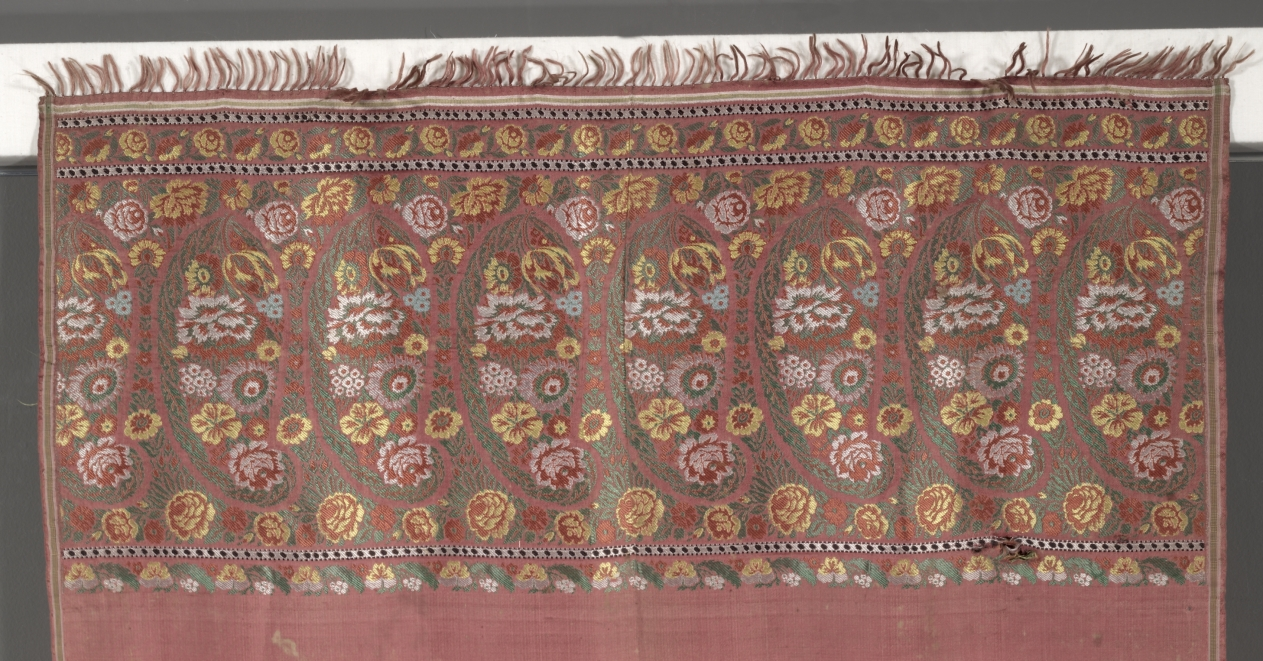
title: Long Shawl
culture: England or France, 19th century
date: 1820s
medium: Twill (Z) weave ground with supplementary weft pattern twill (S) weave; silk; wefts interlaced on back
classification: Textile